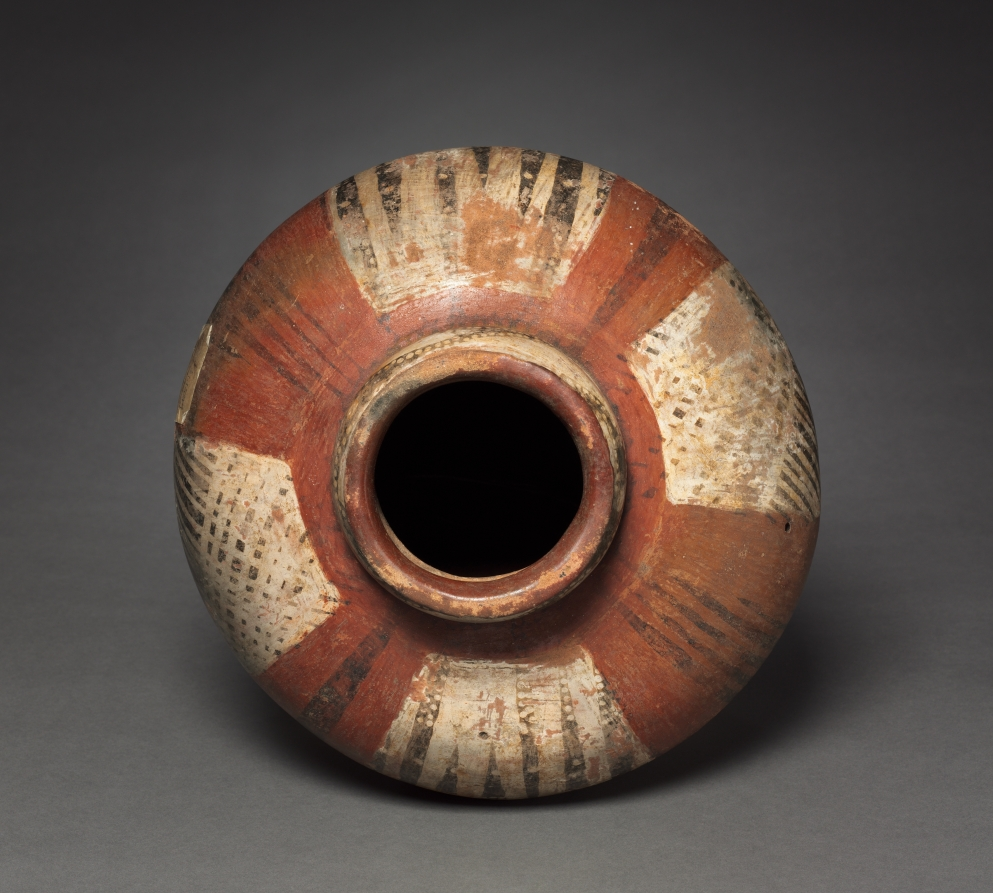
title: Jar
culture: Colombia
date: before 1550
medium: pottery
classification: Ceramic